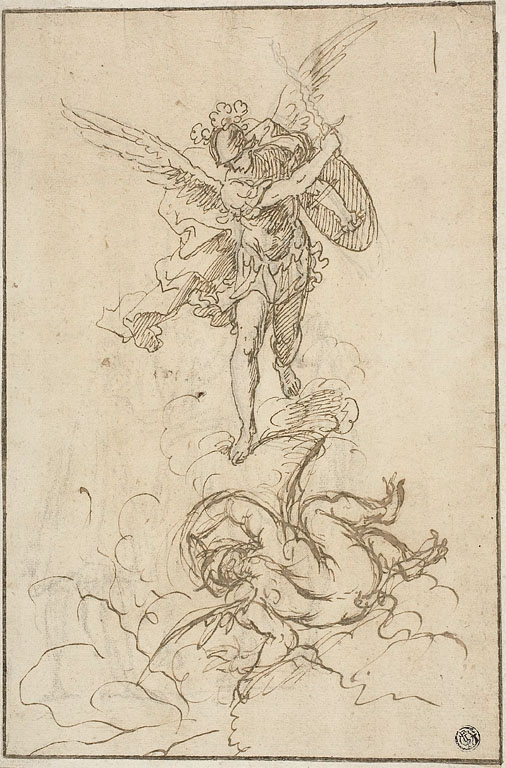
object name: Drawing and Watercolor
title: Saint Michael Conquering Satan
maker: Possibly Antonio Consetti (Italian, 1686-1766); or the school of Luca Giordano (Italian, 1632-1705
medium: Pen and brown ink, over traces of black chalk, on cream laid paper, laid down on ivory laid paper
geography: Italy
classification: drawings (visual works); prints and drawing